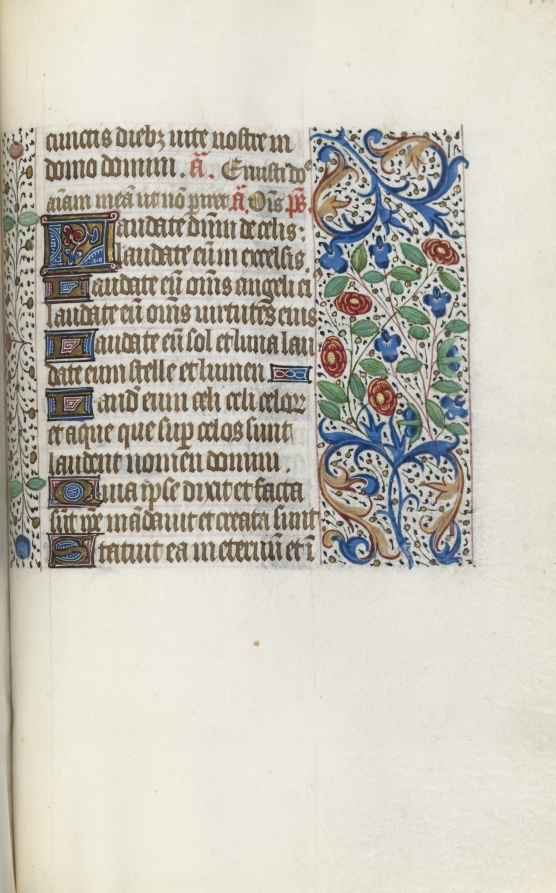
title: Book of Hours (Use of Rouen): fol. 141r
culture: France, Rouen, 15th century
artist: Master of the Geneva Latini (French, active Rouen, 1460–80)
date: c. 1470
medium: ink, tempera, and gold on vellum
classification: Bound Volume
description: In the late 1400s and early 1500s Rouen was an established and important center of book production. The city’s cathedral had a wealthy chapter that spent large sums of money to commission books and to maintain its extensive library. The stationers and booksellers would have likely been concentrated in or near the cathedral precinct. This artist, named after a manuscript now in Geneva, was Rouen’s principal illuminator during the second half of the 1400s.